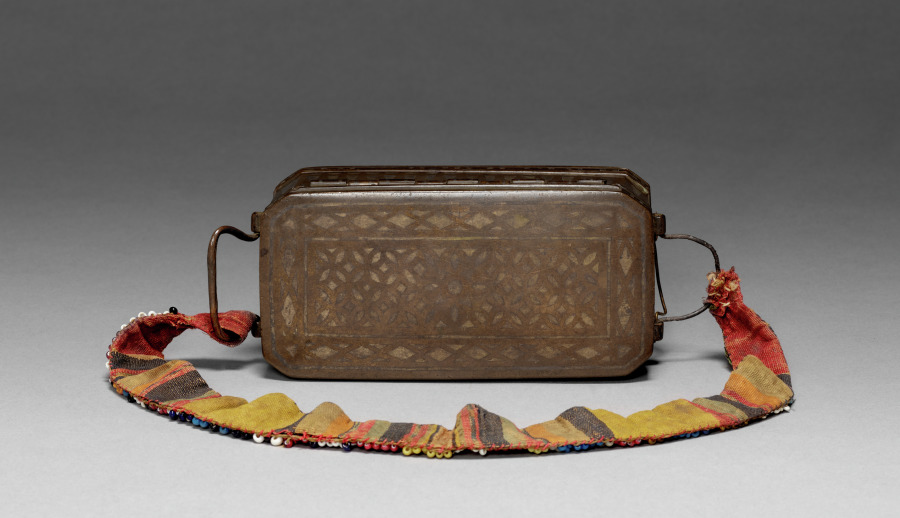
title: Betel nut container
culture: Philippines, Mindanao, most likely Maranao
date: 1800s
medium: Cast brass with silver inlays, weave fabric (handle), glass beads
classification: Arms and Armor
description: Chewing betel has been a social ritual common throughout Southeast Asia and Oceania for centuries. This betel nut container held the ingredients (areca nut, slaked lime, and betel leaves) used for this practice. The rectangular box, made of cast brass, is richly decorated with inlaid silver geometric motifs. It features a multicolored beaded strap with a pattern typical of the Bagobo people.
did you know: The beaded strap suggests portability; it may have been worn or suspended during social gatherings.